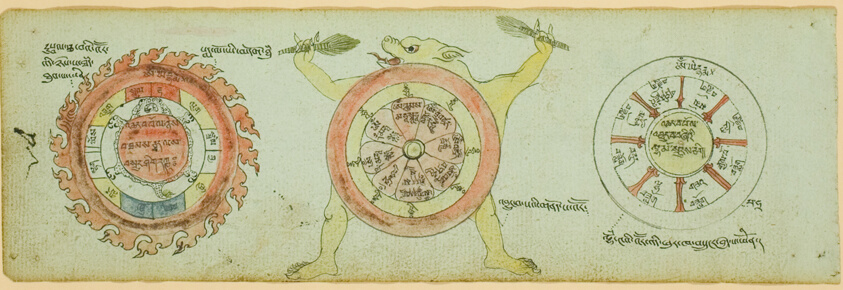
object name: Drawing and Watercolor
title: Page from a Manuscript with Diagrams Protecting against Children's Illnesses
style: Himalayan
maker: Tibet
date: 19th century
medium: Ink and watercolor on paper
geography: Tibet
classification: pen and ink drawings; manuscript; asian art